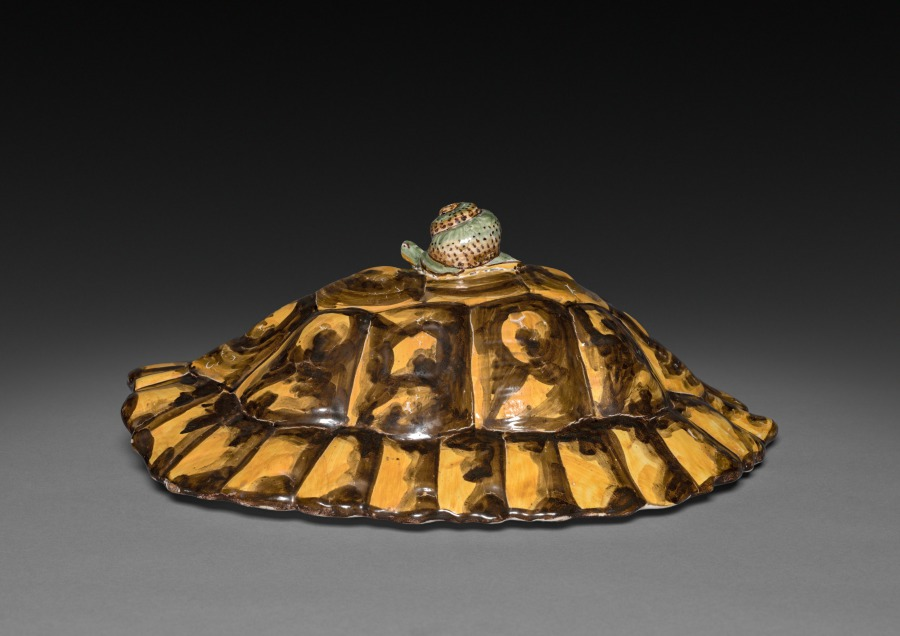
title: Cover for a Tureen in the Form of a Turtle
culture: France, mid 18th century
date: c. 1745–65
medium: faience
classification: Ceramic